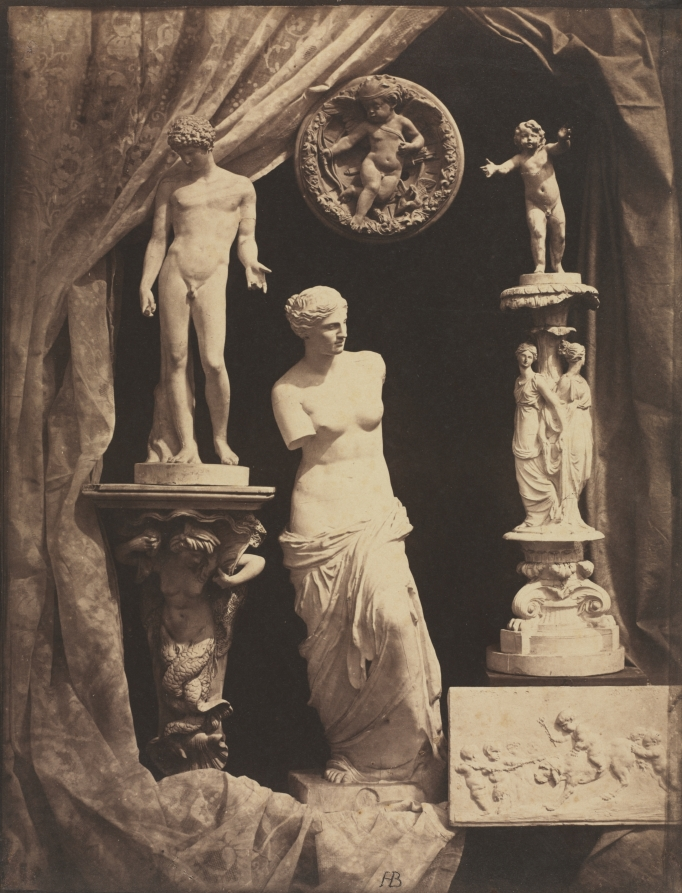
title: Still Life with Statuary and Drapery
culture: France, 19th century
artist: Hippolyte Bayard (French, 1801–1887)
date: c. 1850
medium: albumenized salt print from wet collodion negative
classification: Photograph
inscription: inscribed in negative on recto: "HB"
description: Unlike his contemporaries, Bayard was fascinated with ancient Greco-Roman statuary. From his inventory of over forty examples, he created a captivating still life of plaster casts that affirms his technical proficiency and sensitivity to subject matter. Bright, natural light illuminates the figures and bas reliefs. Their three-dimensionality is emphasized by the stark contrast of their white surfaces with the dark background. The composition is also embellished with gracefully flowing draperies, which frame the scene. Bayard appears not to have had any formal artistic or scientific training, but was a key figure and talented inventor in the early history of photography. Although his contributions were initially ignored, he went on to become a distinguished member of the photographic community in Paris. This rare print from a wet collodion negative is the outcome of Bayard's experimentation with the direct paper positive process, which he began around 1839.